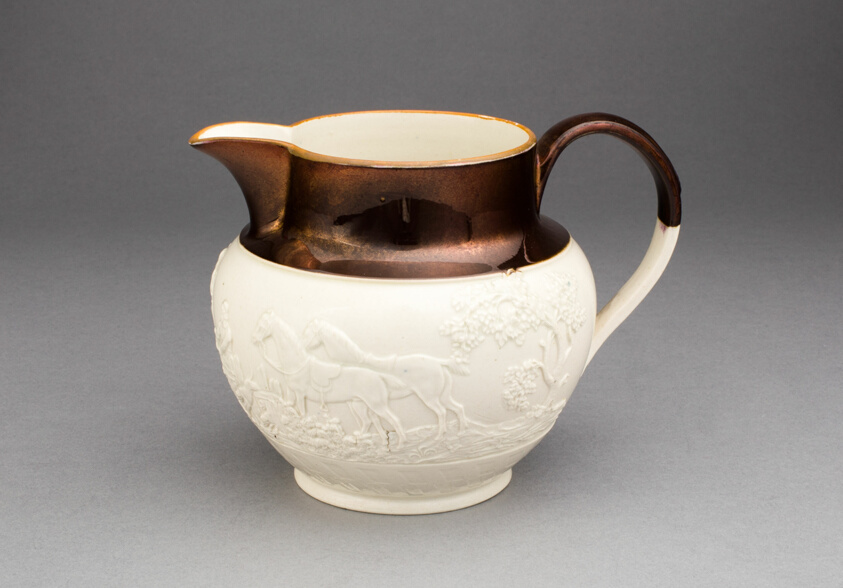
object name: Ceramics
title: Pitcher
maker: England, Staffordshire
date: c. 1830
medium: Earthenware with copper lustre decoration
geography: Staffordshire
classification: pitcher (vessel); earthenware; vessel; european decorative arts; ceramics